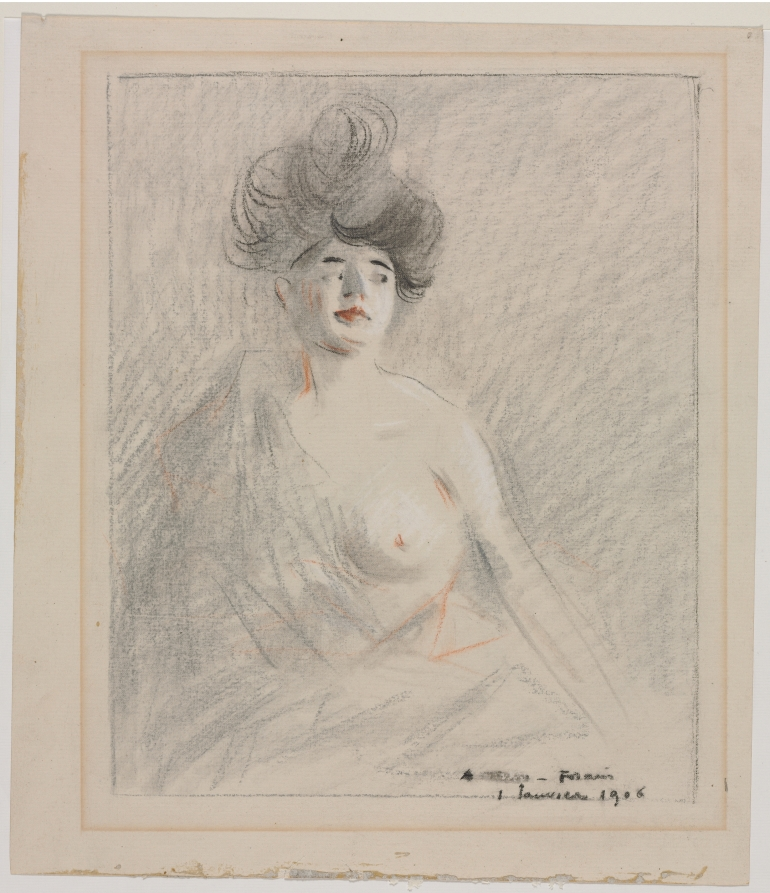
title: Courtesan (recto)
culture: France, early 20th Century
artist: Jean Louis Forain (French, 1852–1931)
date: 1906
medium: black, red, and white chalk; framing lines in black chalk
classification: Drawing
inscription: signed, lower right, in black crayon: A [illegible, scraped away] - Forain / 1 Janvier 1906